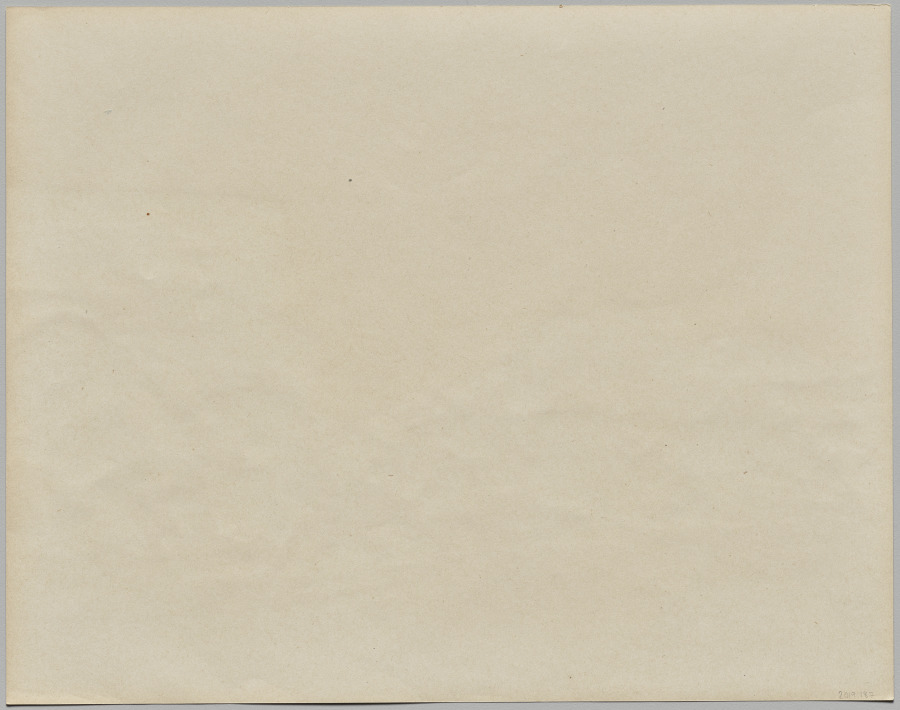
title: India. Calcutta. Upper Chitpore Road (A), after photo by Dr. Kurt Boeck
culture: India, 19th century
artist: Photoglob Co. (Zurich, active c. 1890–1910)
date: c. 1890–1910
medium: Photochrom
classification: Photograph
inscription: Imprinted in gold type on recto: “20005.P.Z-CALCUTTA. UPPER CHITPORE ROAD.”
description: This busy street corner gives us a glimpse into everyday life in turn-of-the-twentieth-century India. Unlike most of the mid-19th century genre photographs of colonial India, which were posed or staged, here people go about their business, unaware that they are being photographed. The color scene was made using a black-and-white negative by Dr. Kurt Boeck, a German actor and mountain climber who became a travel writer and lecturer specializing in Asia.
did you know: Chitpore (now spelled Chitpur) Road is one of the oldest roads in Kolkata (previously Calcutta).